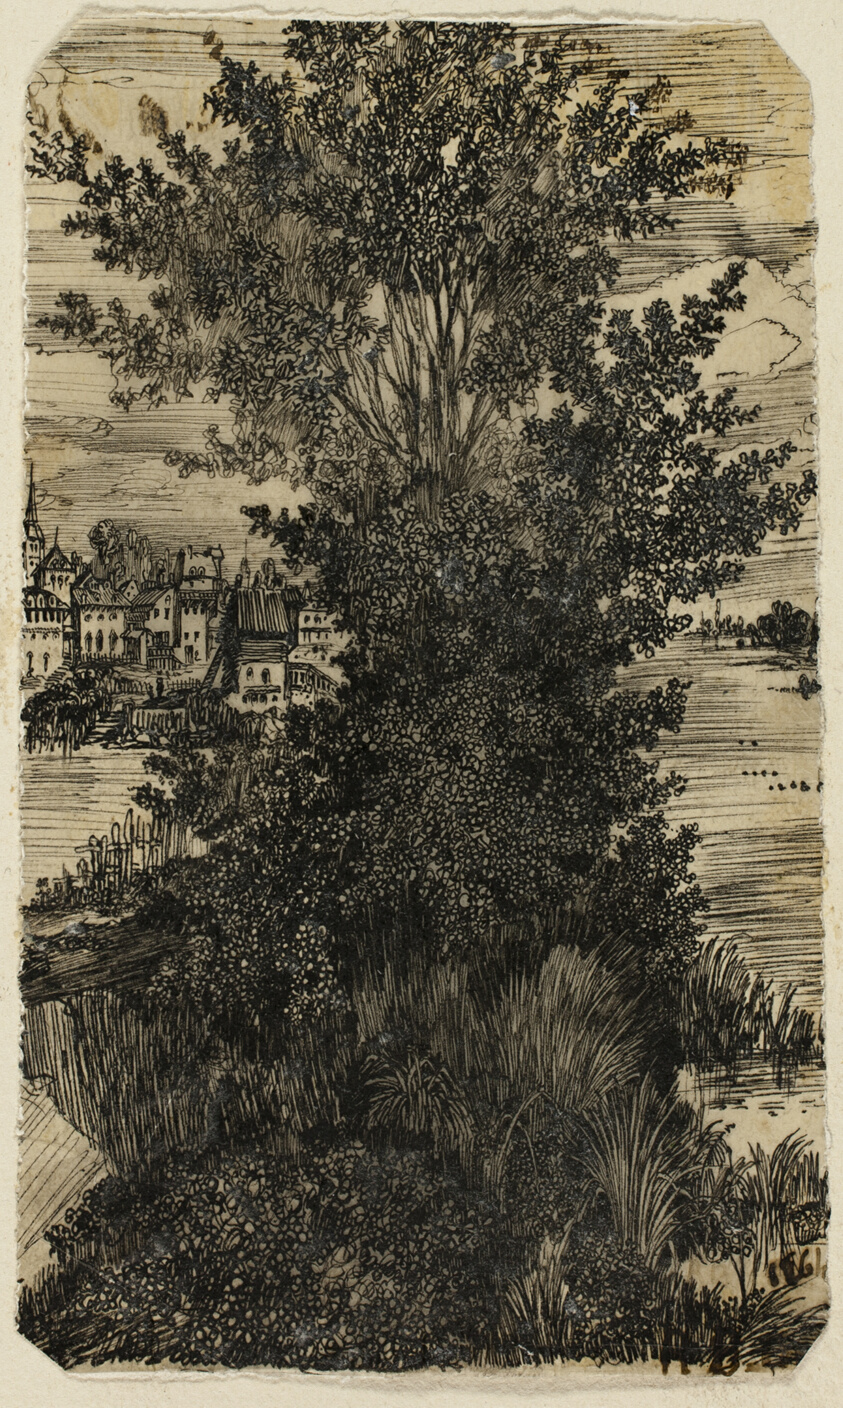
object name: Drawing and Watercolor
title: Clump of Trees with a Village in the Distance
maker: Rodolphe Bresdin (French, 1825-1885)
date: 1861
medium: Pen and black ink, on cream tracing paper, laid down on ivory wove paper, tipped onto buff laid paper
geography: France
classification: pen and ink drawings; drawings (visual works); prints and drawing